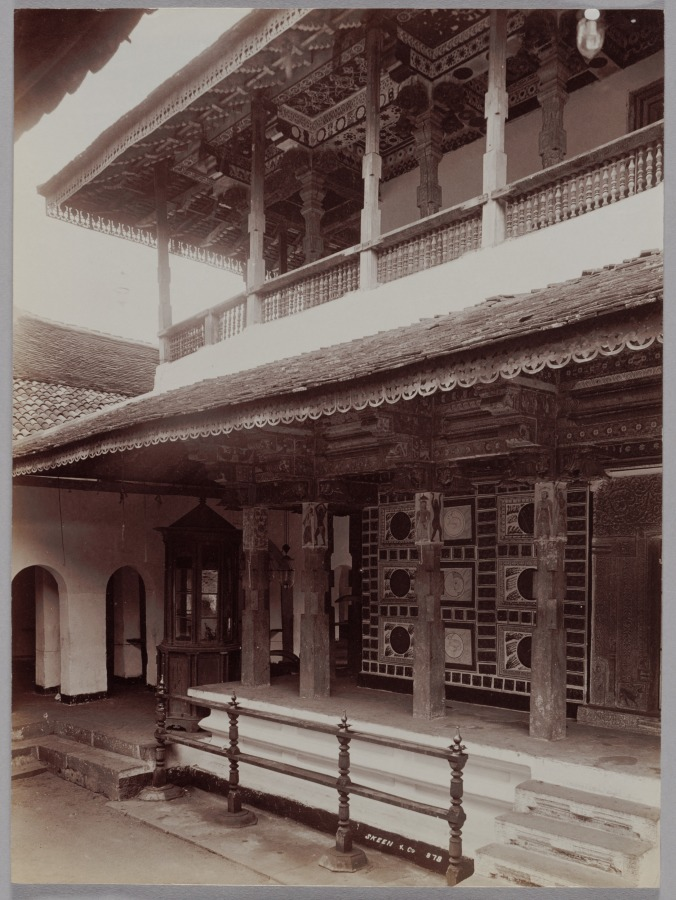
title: Buddhist Temple in Kandy, Ceylon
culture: England, 19th century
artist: Skeen & Co. (British, active 1860–1920)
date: c. 1880s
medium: albumen print from wet collodion negative, hand colored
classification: Photograph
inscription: On recto: "Skeen & Co 878" On verso, in graphite: "Kandy temple" 8078/1